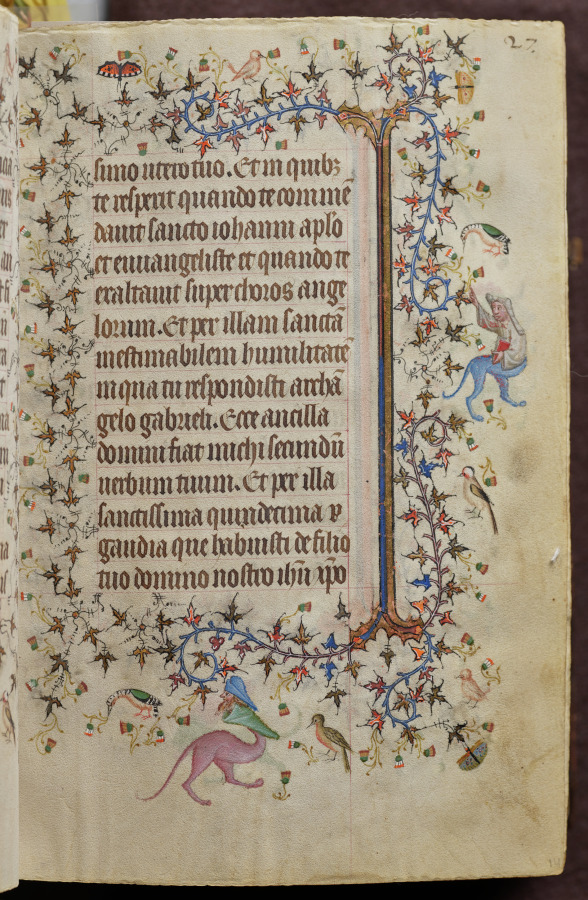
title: Hours of Charles the Noble, King of Navarre (1361-1425): fol. 14r, Text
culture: France, Paris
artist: Master of the Brussels Initials and Associates (French)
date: c. 1405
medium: ink, tempera, and gold on vellum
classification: Bound Volume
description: This precious book was highly prized by its owner, Charles III, King of Navarre, a French-born prince whose coat of arms is painted on 20 folios. Charles visited Paris on numerous occasions and likely acquired this volume there in 1404. Paris was the center of the European book trade at the time and attracted illuminators from many parts of Europe. This manuscript represents one of the most remarkable fusions of French and Italian taste in book illumination. Though conforming to Parisian standards, most of the book’s major miniatures are the work of the Brussels Initials Master, an Italian illuminator who previously worked in Bologna and Padua.